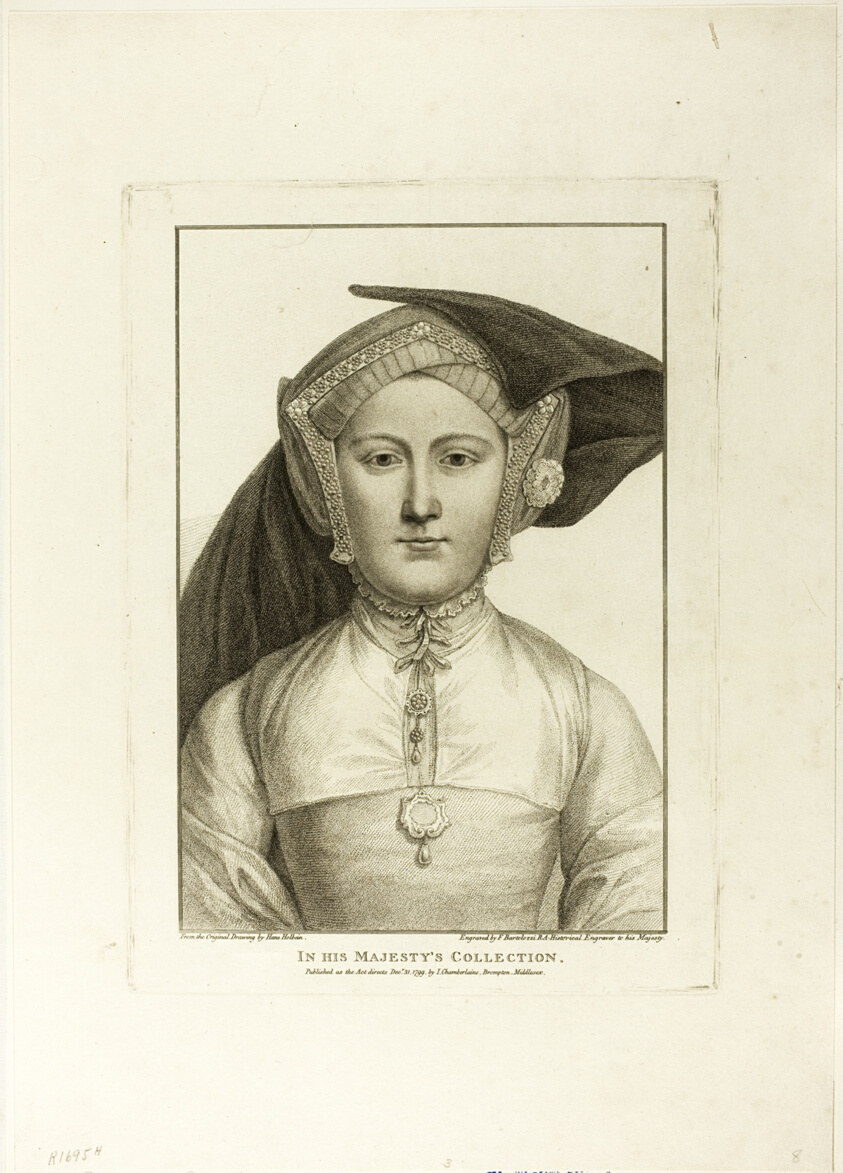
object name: Print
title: Portrait of a Woman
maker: Francesco Bartolozzi (Italian, 1727-1815); after Hans Holbein the younger (German, 1497-1543)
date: December 31, 1799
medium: Stipple engraving on ivory wove paper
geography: Italy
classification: engraving; print; prints and drawing